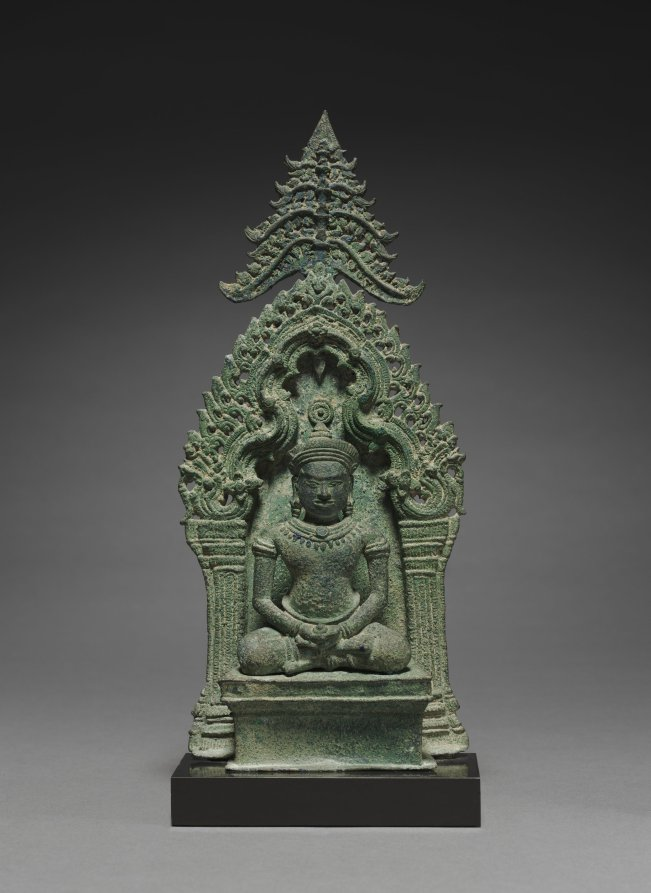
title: Altarpiece with Buddha Enthroned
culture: Cambodia, found in Vietnam, near Ho Chi Minh City, Reign of Suryavarman II, Angkor Wat Period, 1st half 12th Century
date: mid-1100s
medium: bronze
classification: Sculpture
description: The crown and jewels of this Buddha indicate that he is a transcendent Buddha, not the historical Buddha who lived in the 5th century BCE. Small-scale bronze images of transcendent Buddhas were used in tantric practices as personal meditation images or in ritual settings. Tantric Buddhism was adopted as the state religion during the 12th century in the region of Angkor. A depiction of the tree that references the moment of the Buddha’s enlightenment is above the scalloped serpentine form of the niche under which he sits enthroned on an altar. An object interpreted as a lotus bud rests on the hands in his lap as he sits in a posture of meditation.